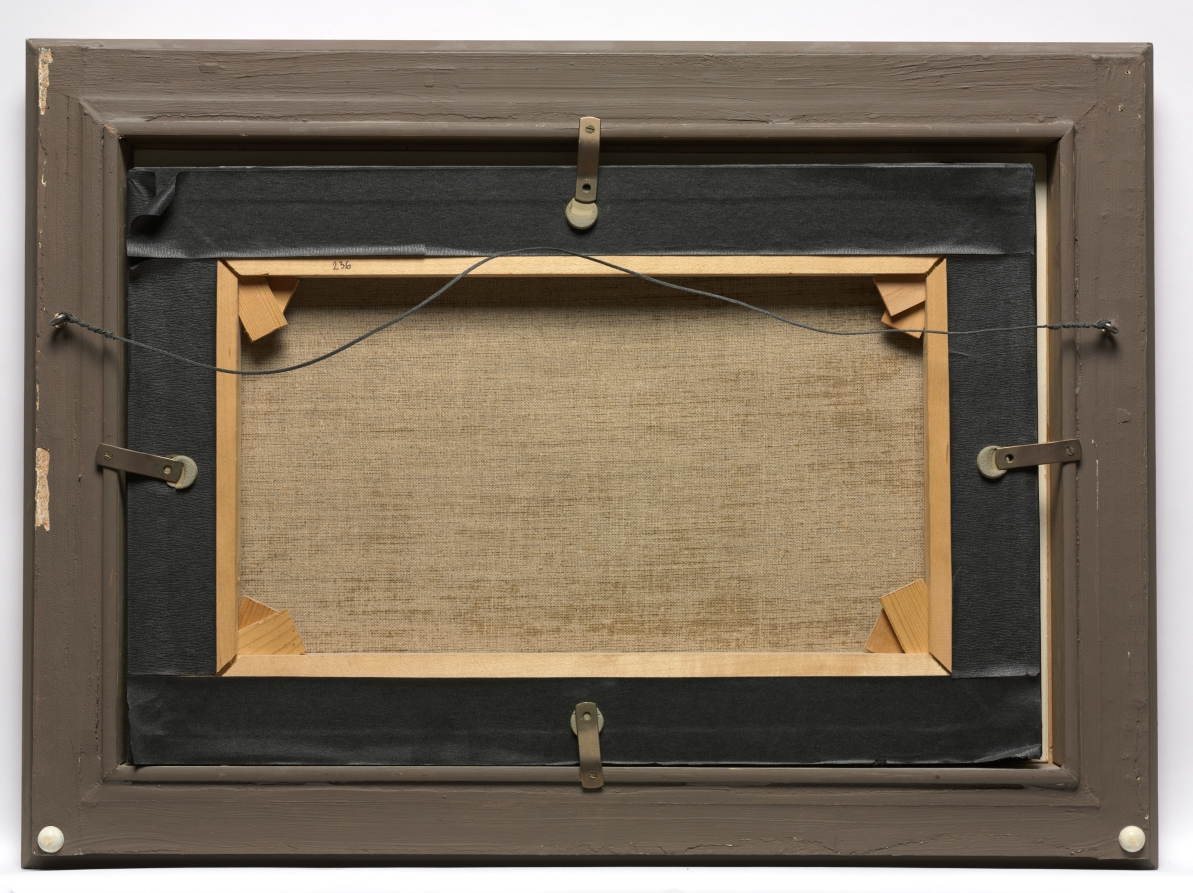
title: Landscape with Rider on White Horse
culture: France, 19th century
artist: Jean Achille Benouville (French, 1815–1891)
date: 1846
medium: oil on canvas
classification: Painting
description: The darkly shaded trees and turbulent sky introduce a romantic sentiment into this classical or ideal landscape in which a lone rider on horseback gallops through a deep space. The composition is organized into three clearly defined zones that recede from the path in the foreground, to the lake or river in the middle ground, to the distant rocky mountain and sea.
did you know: In 1863, Benouville was named a Knight in the Legion of Honor, the highest French order of merit.